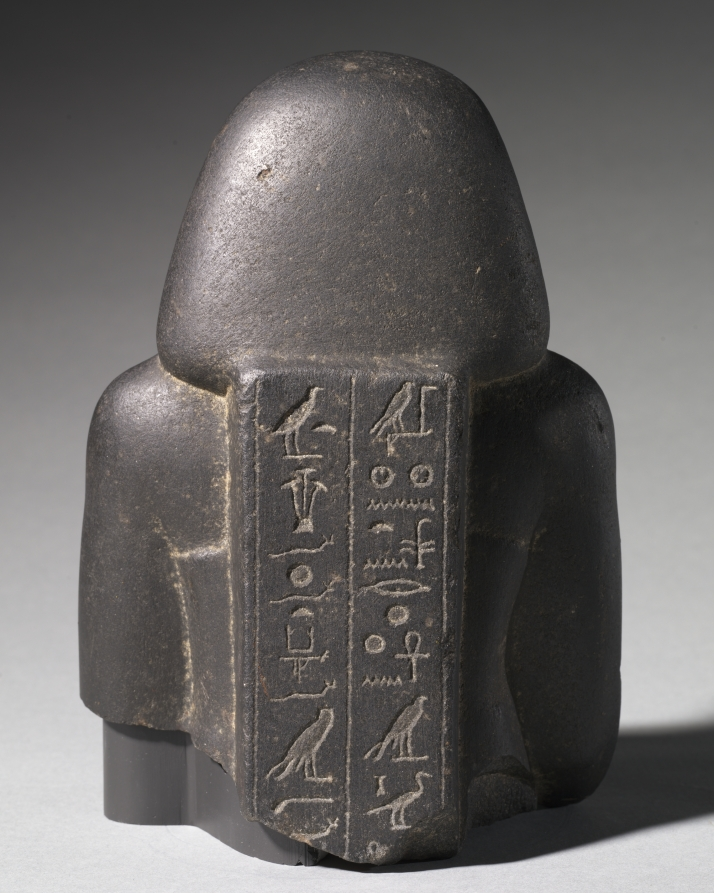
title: Bust of Ankh-Hor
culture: Egypt, Late period (715–332 BCE), Dynasty 27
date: 525–404 BCE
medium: basalt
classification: Sculpture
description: This bust of Ankh-Hor comprises the top portion of a temple statue. From the position of the arms, it is evident that it originally belonged to a striding figure holding a naos, or shrine, containing the image of a deity. His high-waisted wraparound robe, fashionable during the Persian period (Dynasty 27) when this figure was carved, would have reached to his ankles.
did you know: The black volcanic basalt stone imparts a sleek appearance to this revered temple statue.